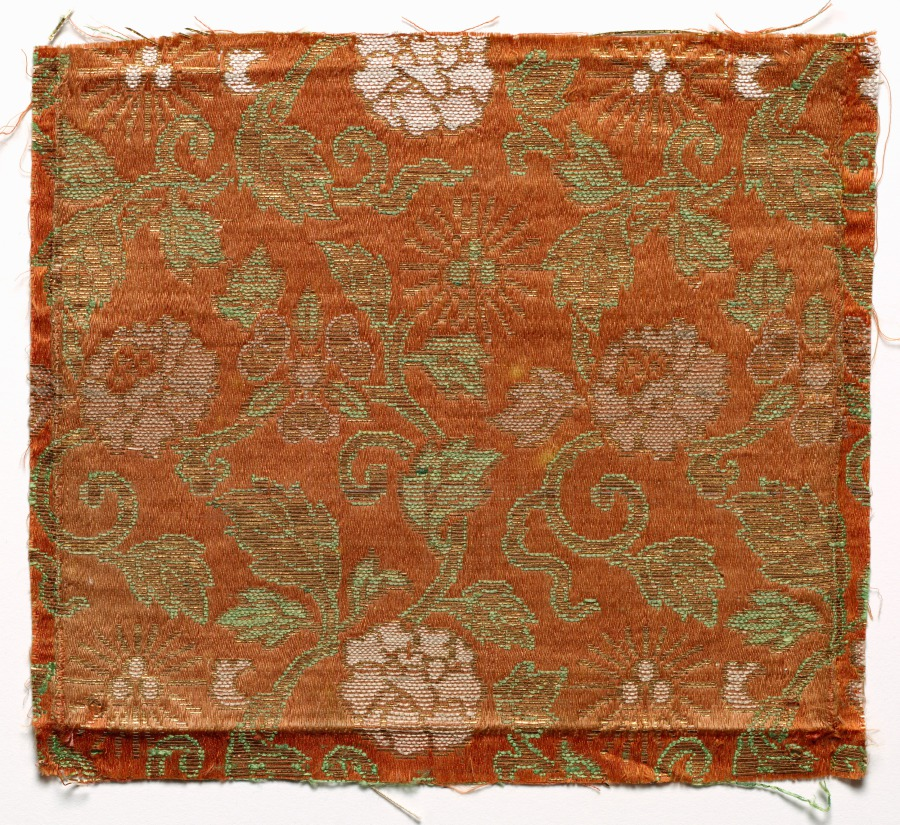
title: Textile Fragment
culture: Japan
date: 1800s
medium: silk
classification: Textile